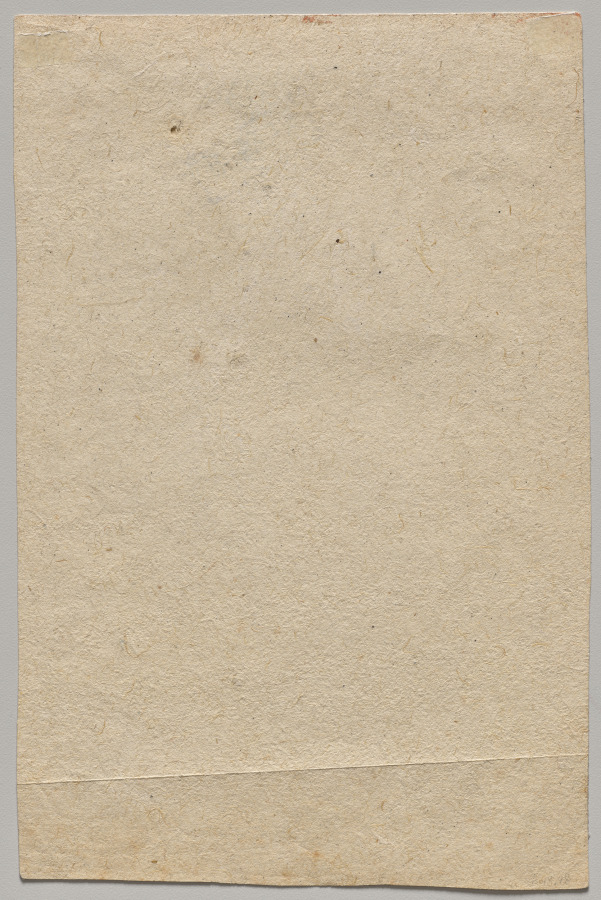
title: Goddess standing on a mountaintop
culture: Northern India, Pahari kingdoms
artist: attributed to Master of the court of Mandi (Indian)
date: c. 1720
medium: Gum tempera and gold on paper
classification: Painting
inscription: 67. 30. 83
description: The four-armed goddess, whose name remains unknown, presides over a scene of carnage. Two dark-skinned women offer halved heads full of blood. A buffalo that stands for her devotees’ enemies has been sacrificed. Jackals and birds of prey cheerfully take away shares of flesh. An important aspect of religious practice in the northwest Himalayas, the worship of fierce goddesses was thought to aid their devotees in conquering enemies, psychological and otherwise. She wears the enemies as corpses in her ears and as a garland around her neck.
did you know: The Goddess is wearing a garland of corpses.